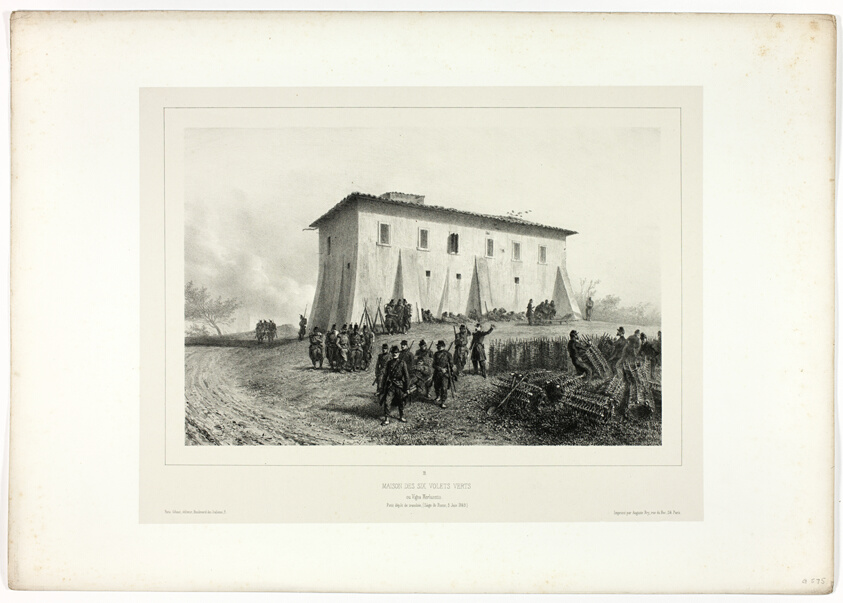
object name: Print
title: House of Six Green Shutters, from Souvenirs d’Italie: Expédition de Rome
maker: Denis Auguste Marie Raffet (French, 1804-1860); printed by Auguste Bry (French, 19th century); published by Chez Gihaut Frères (French, 19th century)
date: 1858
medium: Lithograph in black on warm ivory wove chine laid down on off-white wove paper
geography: France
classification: lithograph; print; prints and drawing